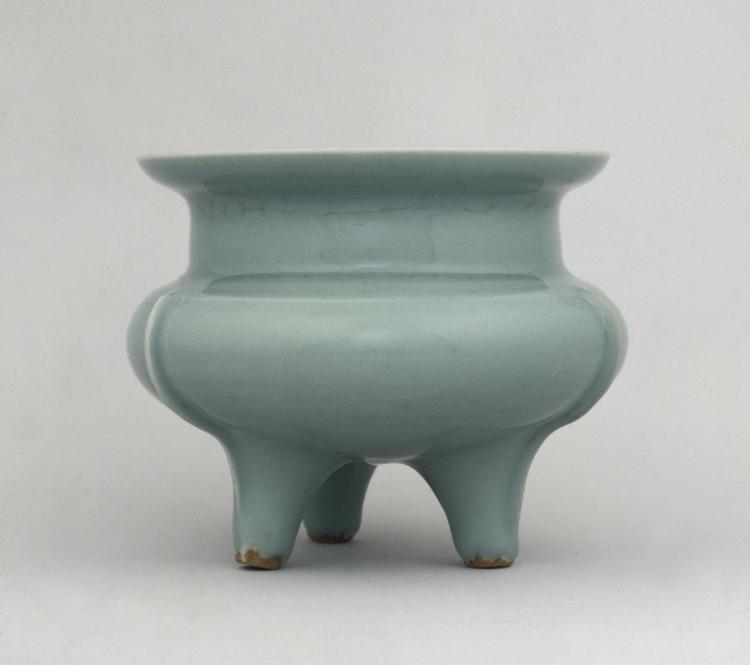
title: Incense Burner in the Form of Archaic Li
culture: China, Zhejiang province, Southern Song dynasty (1127-1279)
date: 1200s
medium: glazed porcelain, Longquan ware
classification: Ceramic